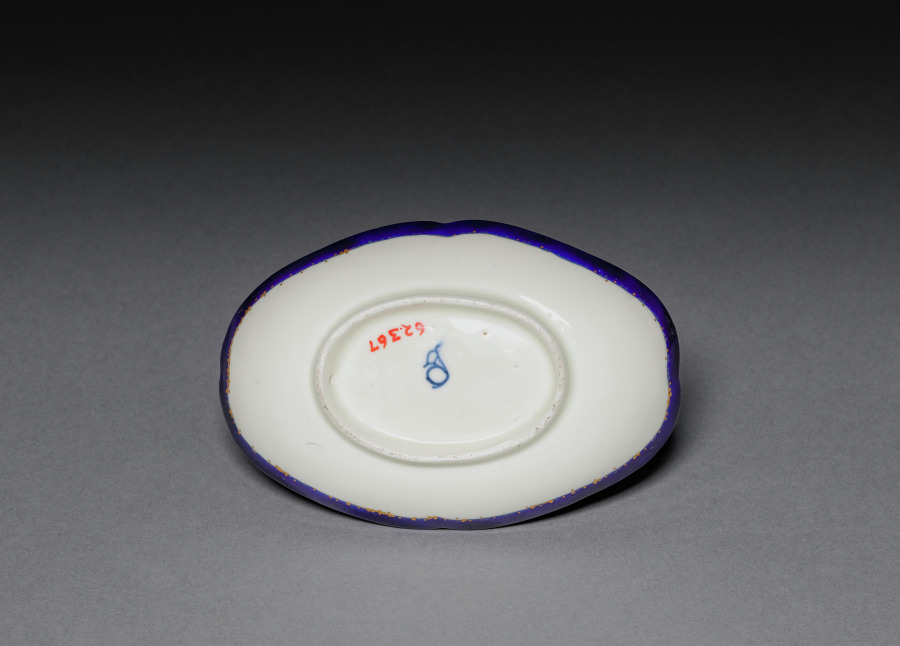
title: Mustard Pot with Stand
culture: France, Chantilly, 18th century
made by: Chantilly Porcelain Factory (French)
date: c. 1775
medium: soft-paste porcelain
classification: Ceramic